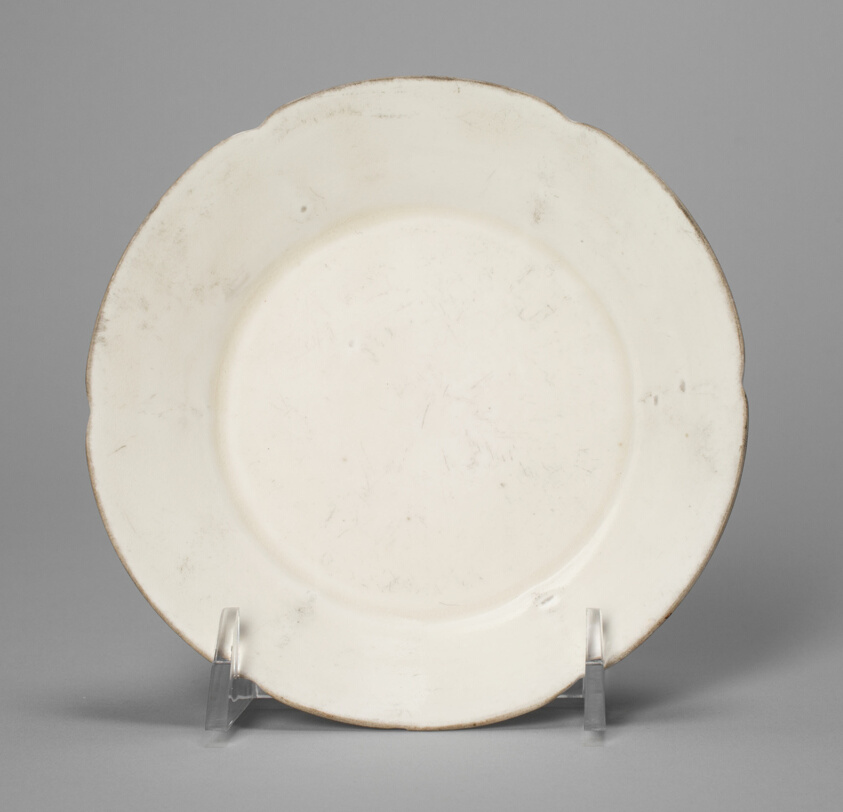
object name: Vessel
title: Lobed Dish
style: Chinese (culture or style)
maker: China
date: Song dynasty (969–1279)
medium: Ding ware; porcelain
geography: China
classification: dish (vessel); asian art; ceramics; vessel